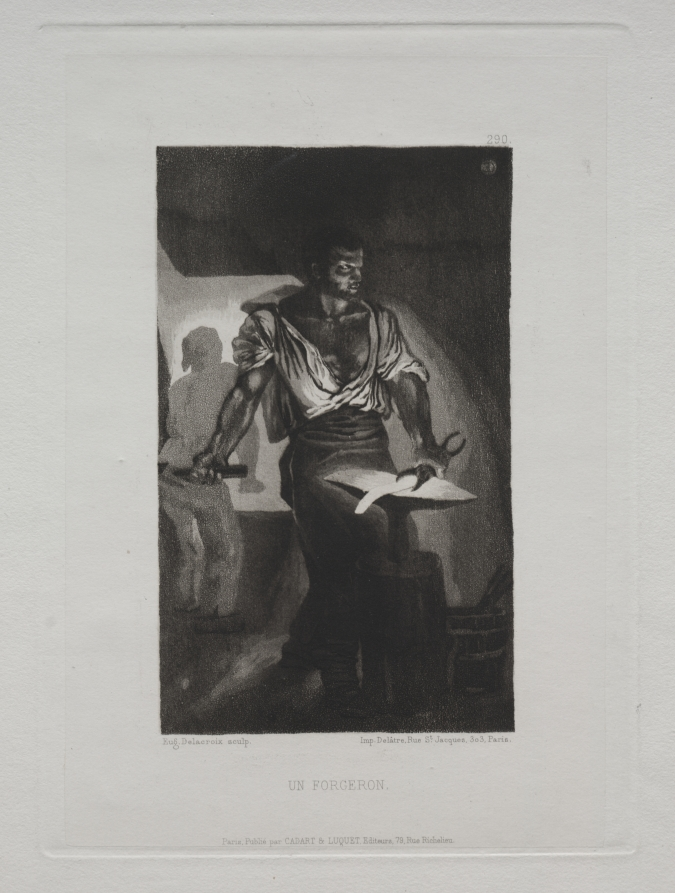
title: The Blacksmith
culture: France, 19th century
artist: Eugène Delacroix (French, 1798–1863)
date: 1833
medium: aquatint, drypoint, and roulette on chine collé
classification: Print